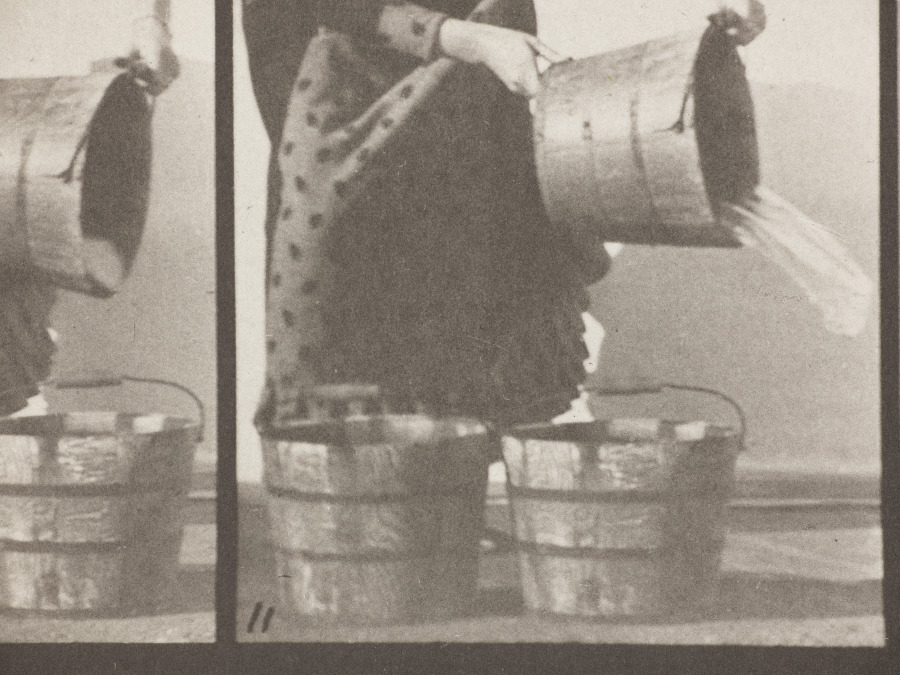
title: Emptying a Bucket of Water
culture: America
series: Animal Locomotion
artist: Eadweard J. Muybridge (American, 1830–1904)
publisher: University of Pennsylvania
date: 1887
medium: collotype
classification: Photograph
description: Eadweard J. Muybridge initially used horses to capture motion as separate slices of time faster than the human eye could perceive them, then moved on to study other animal and human movements. Everyday activities, like emptying a bucket of water, were broken down and sequenced back-to-back. This series was commissioned by the University of Pennsylvania and intended to diagnose dysfunction in human movement by allowing each consecutive action to be studied in isolation. The university’s desire for distribution called for the use of collotype. The process had been recently improved to the point where editions of up to 1,000 were possible, making it an attractive option for publishers.